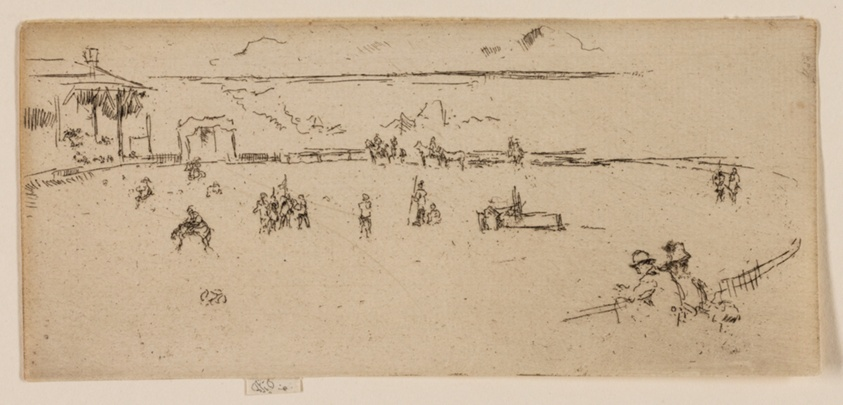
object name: Print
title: The Bucking Horse, Wild West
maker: James McNeill Whistler (American, 1834-1903)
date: 1887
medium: Etching and drypoint with foul biting in black ink on cream laid paper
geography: United States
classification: etching; foul biting; print; prints and drawing; drypoint; paper